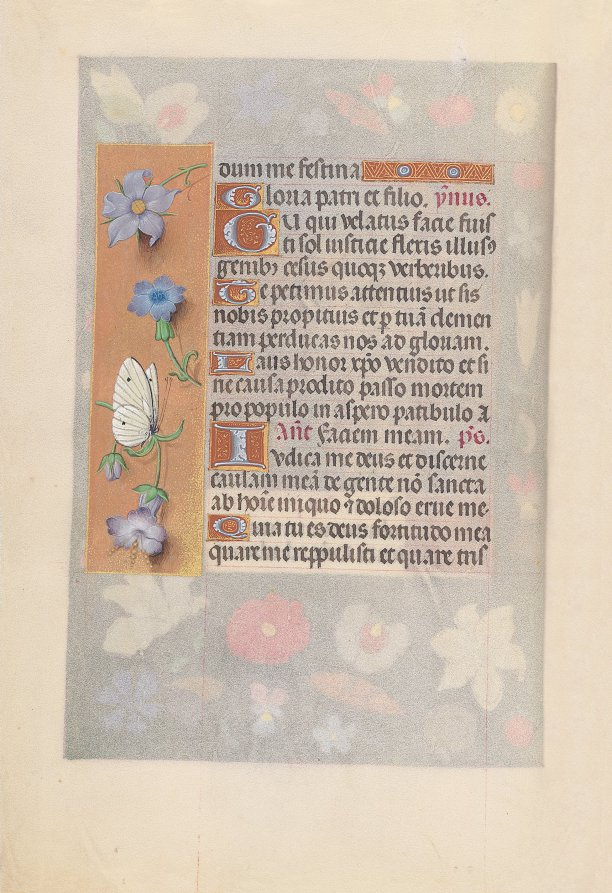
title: Hours of Queen Isabella the Catholic, Queen of Spain: Fol. 61v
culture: Flanders, Ghent and Bruges, late 15th century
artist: Master of the First Prayerbook of Maximillian (Flemish, c. 1444–1519)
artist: and Associates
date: c. 1500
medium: ink, tempera, and gold on vellum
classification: Bound Volume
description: This manuscript was illuminated by a circle of at least five highly organized manuscript painters active in the Flemish cities of Ghent and Bruges. The principal illuminator was Alexander Bening, who painted the majority of the book's miniatures. Manuscripts produced by this circle of artists are renowned for the decoration of their borders, which typically feature a rich variety of realistically-painted flowers, birds, and butterflies. This prayer book, called a book of hours, was intended not for a cleric, but for the private devotions of a lay person-in this case, Isabella the Catholic, Queen of Spain (1451-1504). Isabella's coat of arms embellishes the book's frontispiece. It is unlikely that the book was commissioned by the Queen herself; rather, she probably received it as a diplomatic gift from someone courting her patronage, perhaps Cardinal Francisco Jimenez de Cisneros. A Franciscan friar, Jimenez was dependent upon Isabella for his advancement, first to the post of Queen's confessor in 1492, and then to Archbishop of Toledo in 1495.